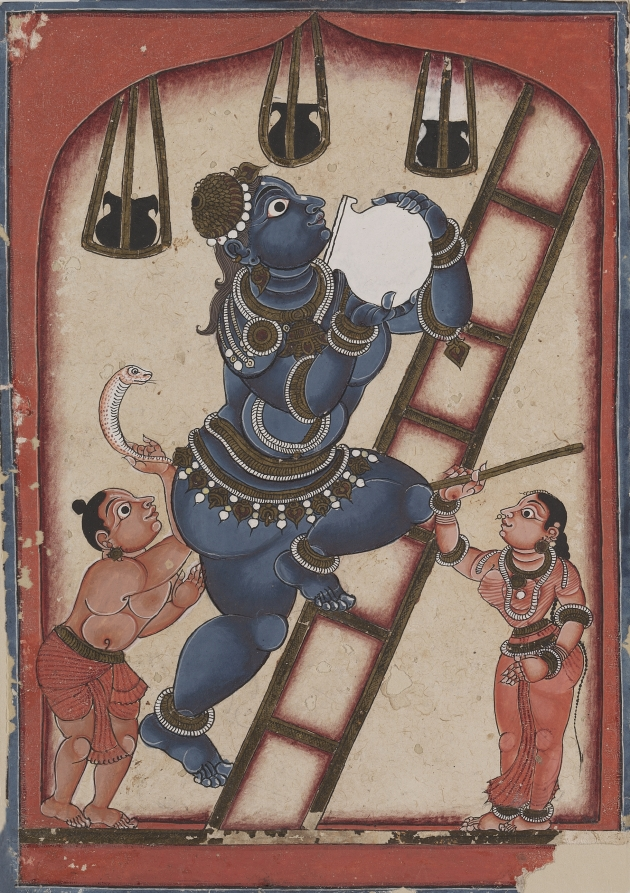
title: Krishna Stealing Curds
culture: Southern India, Andhra Pradesh, Tirupati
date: late 1700s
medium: gum tempera and gold on paper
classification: Painting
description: As a toddler growing up in a rural cowherding community, Krishna loved to eat the dairy products his parents attempted to keep out of his reach. With bold rounded contours and modeling, the blue-skinned Krishna totters precariously on a ladder, while his irate foster mother brandishes a stick at him.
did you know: Krishna’s brother Balarama holds a snake, since he is an incarnation of Vishnu’s cosmic serpent.